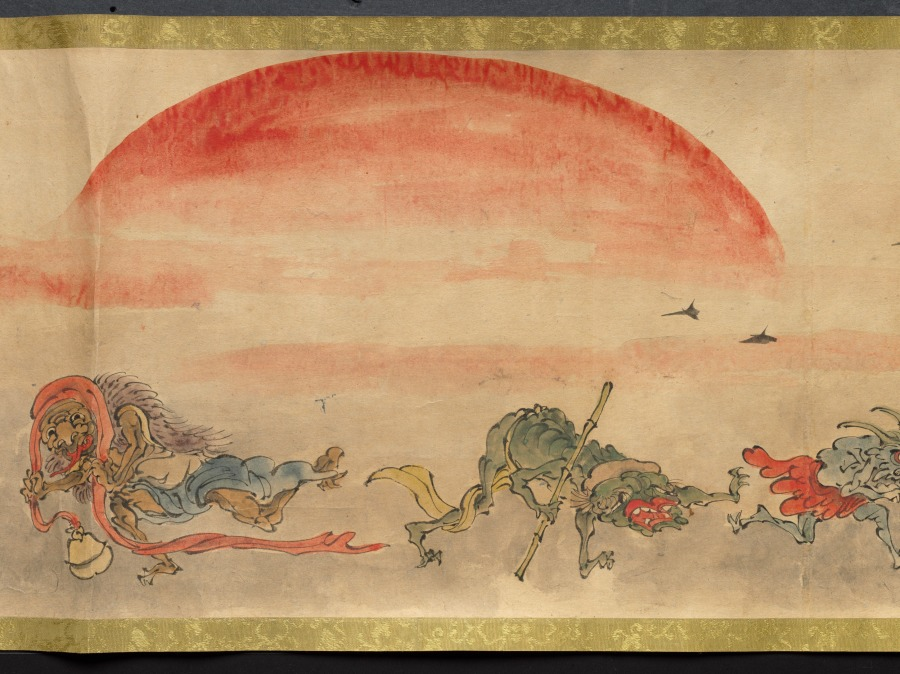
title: An Illustrated Marriage of Apparitions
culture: Japan, Edo period (1615–1868)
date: mid-1800s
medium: handscroll; ink and color on paper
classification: Painting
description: The matchmaking, engagement, wedding, and birth of the first child of two apparitions, or bakemono, literally "things that change," are illustrated in this whimsical, humorous handscroll. Japanese folklore abounds with such strange creatures, most famously represented in handscrolls featuring a procession of 100 supernatural monsters. Aside from a textual preface and cartouches indicating the content of the scenes, the tale is told visually. The artist and whereabouts of the original handscroll are unknown, but a number of other 19th-century copies by amateur painters exist in Japanese collections, attesting to its broad appeal.